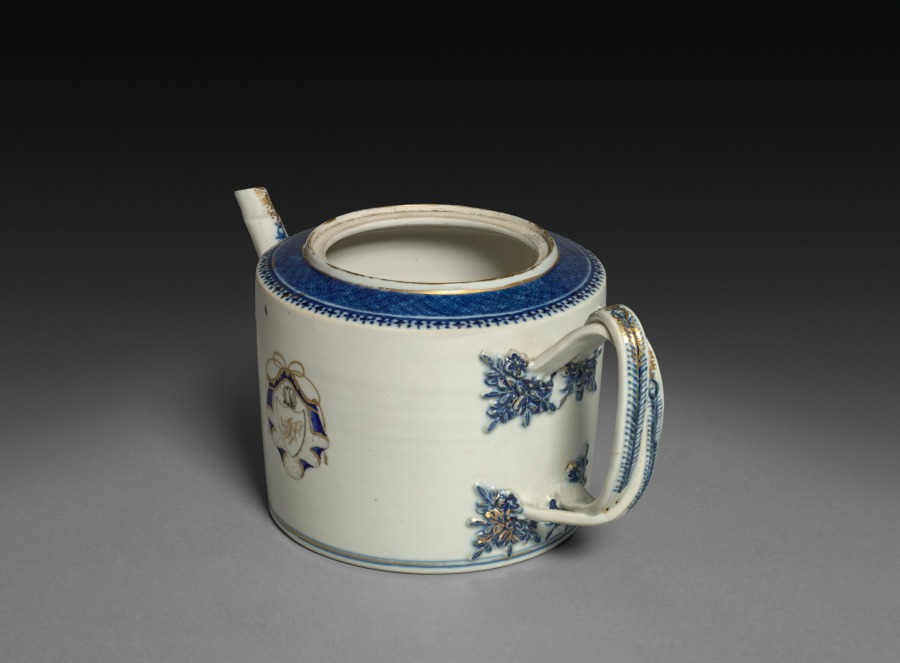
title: Teapot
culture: China, Chinese Export -- English or American Markets, 18th century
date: c. 1775–1800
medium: porcelain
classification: Ceramic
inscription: on body of teapot, in heraldic shields: "JS."